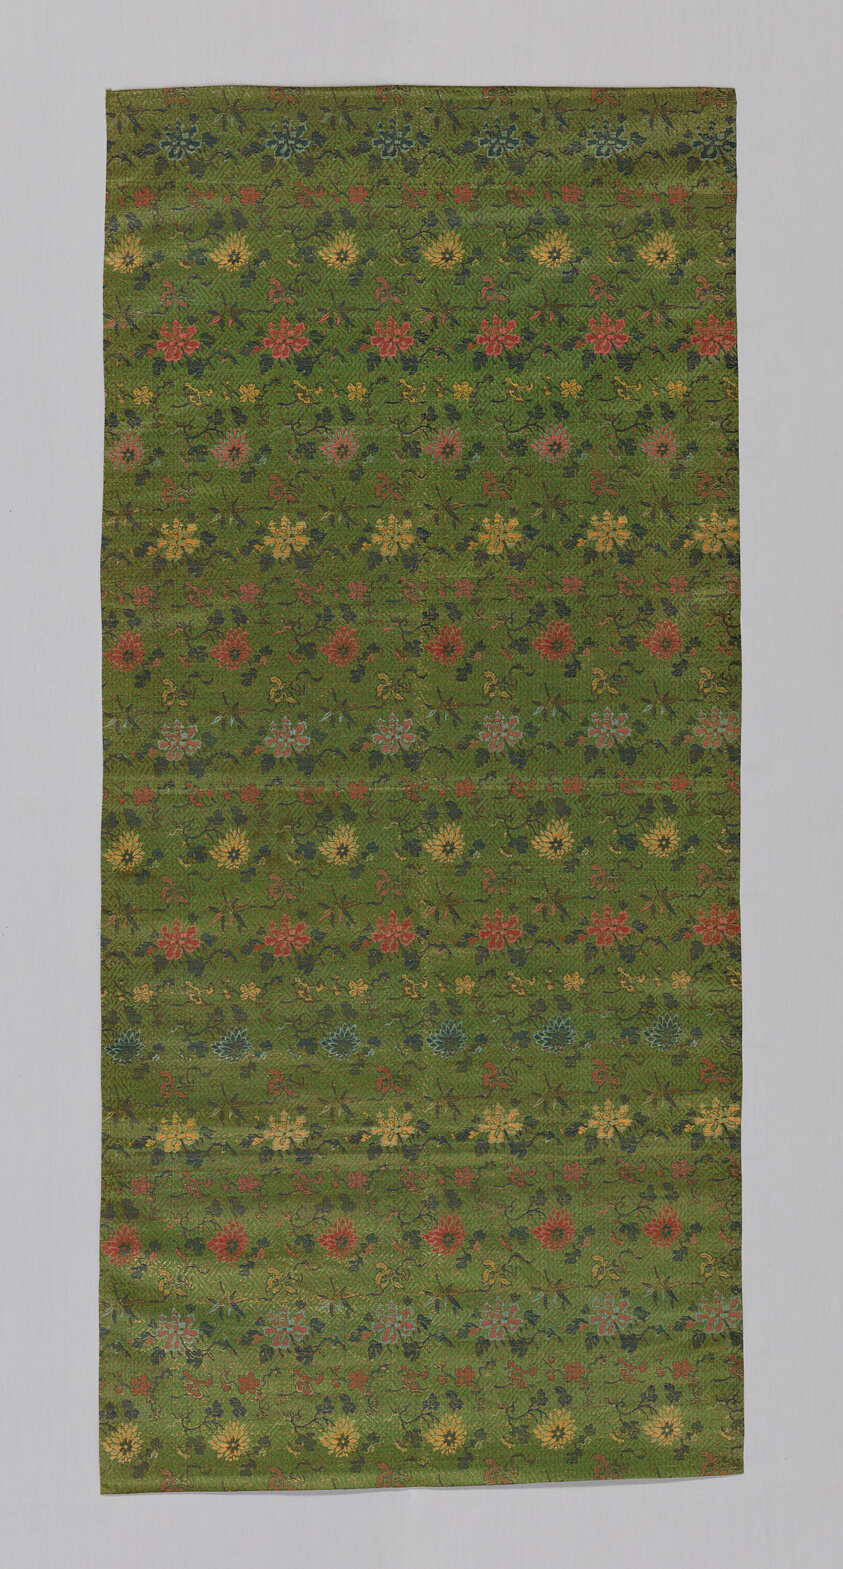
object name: Textile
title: Fragment (Furnishing)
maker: China?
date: 1875/1900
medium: satin weave with gold foil on paper strips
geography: China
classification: textile; weaving